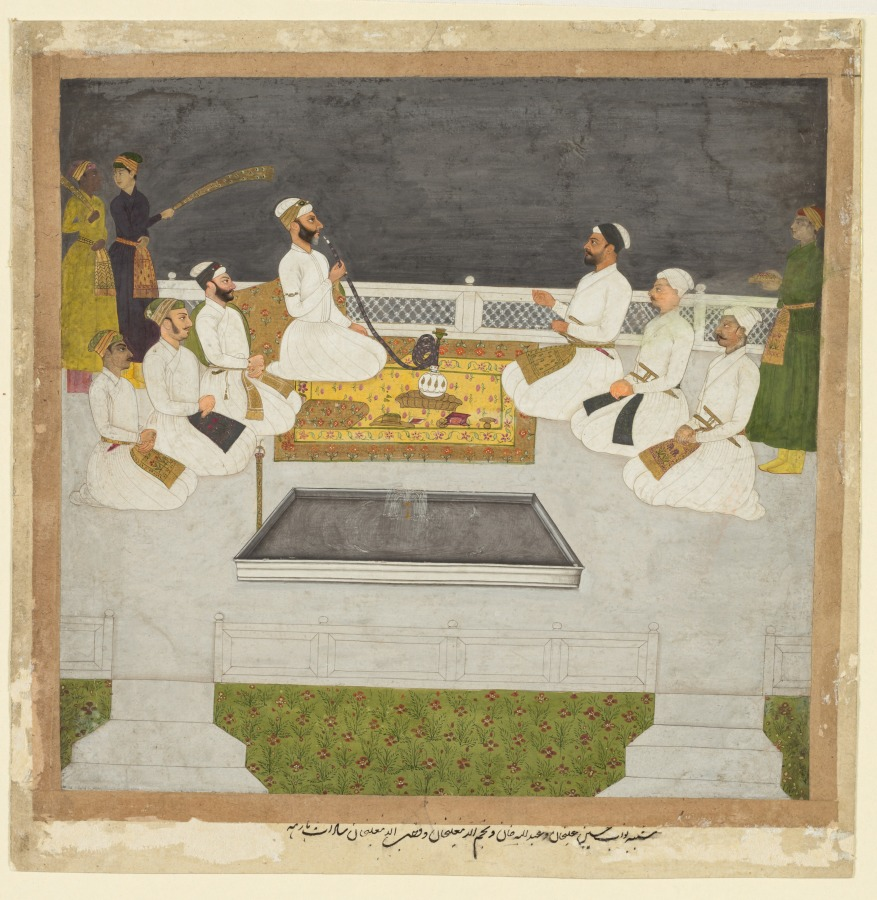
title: Husain Ali Khan Entertaining His Brothers (The Sayyid Brothers)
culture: India, Mughal Dynasty (1526-1756)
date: c. 1712–19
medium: Gum tempera, ink, and gold on paper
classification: Painting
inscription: Persian inscription at bottom, in nasta‘liq script: Portraits of Nawab Husayn-Ali Khan and Abdullah Khan and Najm al-Din Ali Khan and Fakhr al-Din Ali Khan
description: The shrewd imperial oligarch smoking the hookah and his brothers ran the Mughal government after the death of Emperor Alamgir in 1707 until the rise of Emperor Muhammad Shah in 1719. They were ruthless, self-serving kingmakers who caused the assassinations and accessions of six different members of the royal family to the Mughal throne in Delhi. The two attendants behind him exchange a worried glance, and the rare use of a flat gray sky behind the white marble terrace suggests the artist’s mood about the future strength and prosperity of the empire.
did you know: The man shown smoking a hookah is the Mughal imperial ruler.